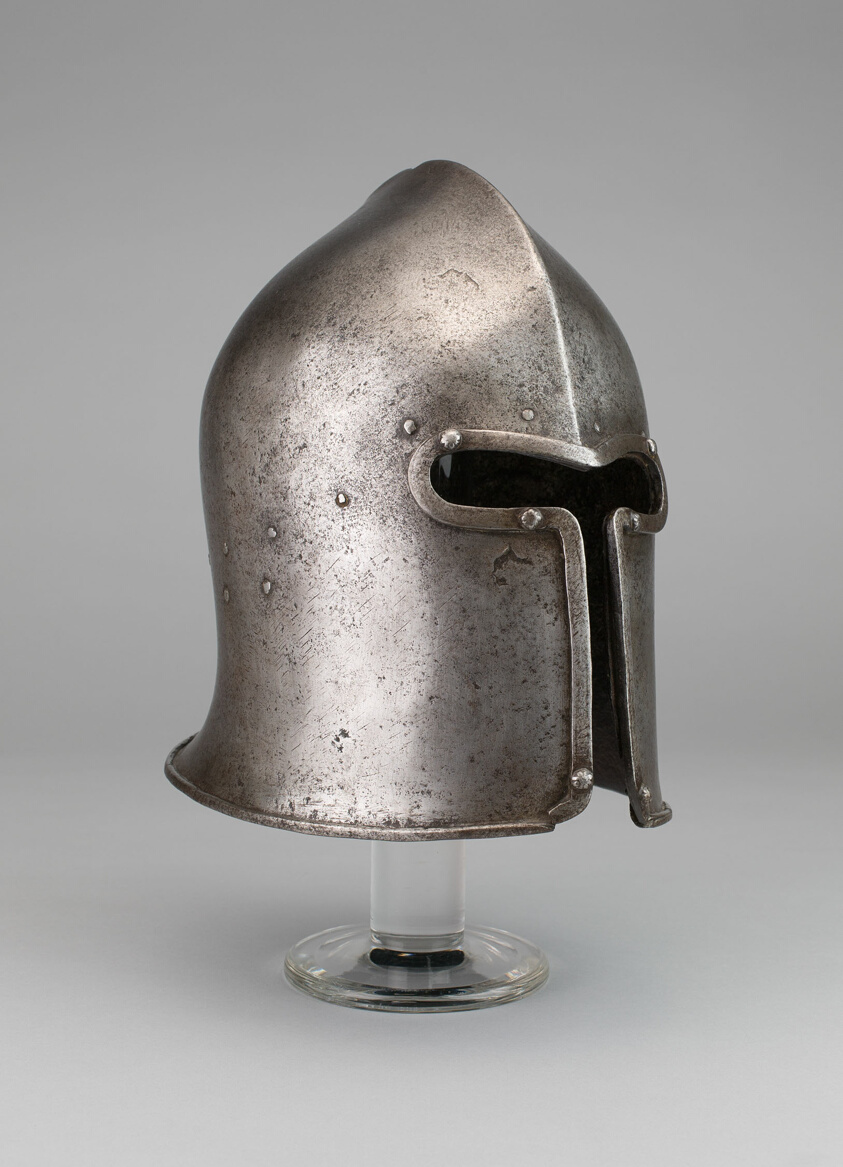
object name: Armor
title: Sallet (Barbuta)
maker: Master Z O (Italian); Milan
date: 1450/60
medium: Steel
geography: Milan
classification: suit-helmet; armor; arms and armor